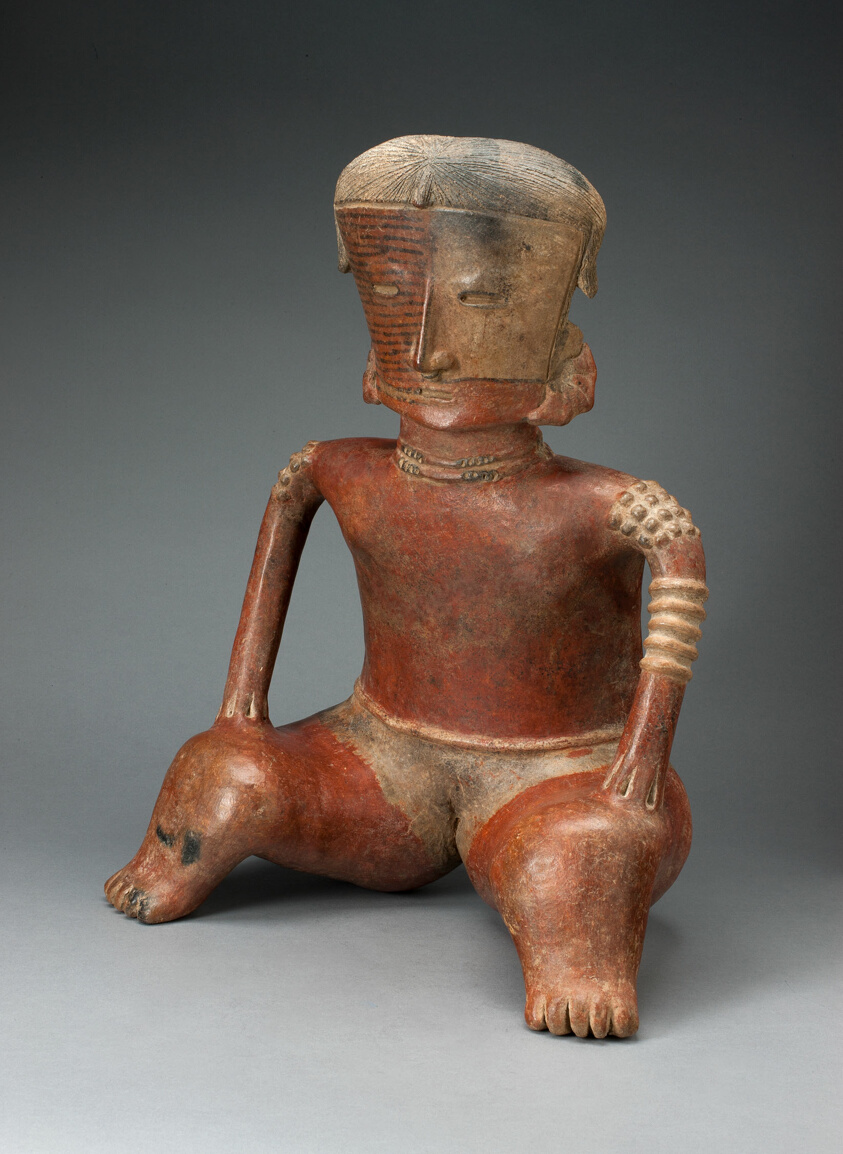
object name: Sculpture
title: Figure of a Seated Female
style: nayarit, Arts of the Americas, mesoamerican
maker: Nayarit, Lagunillas; Nayarit, Mexico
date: 100 BCE–500 CE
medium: Ceramic and pigment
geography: Western Mexico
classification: earthenware; art of the americas; ceramics; sculpture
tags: people